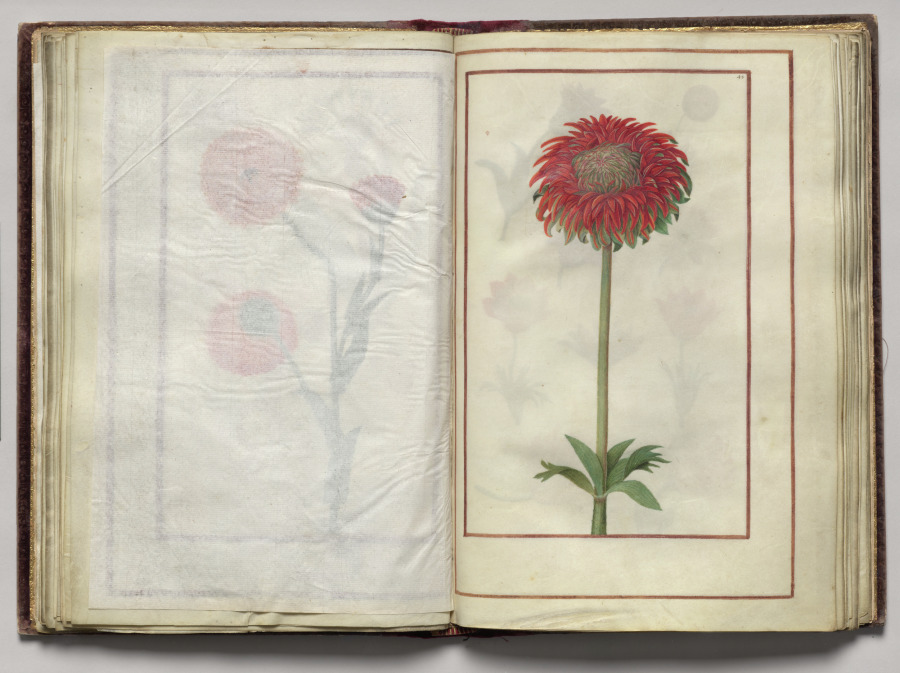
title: Florilegium (A Book of Flower Studies)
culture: France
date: 1608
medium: bound manuscript of 48 leaves, 77 drawings; watercolor, ink, silver, and gold over occasional traces of pencil, on vellum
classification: Bound Volume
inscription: Dated: Poitiers 1608 (on frontispiece) Signed: On frontispiece in black ink, lower right: Van Kuyk Notation on drawing: Frontispiece: in pencil, lower margin: * élève de Van Kessel, peintre flammand (* in pencil also appears in front of Van Kuyk's name).